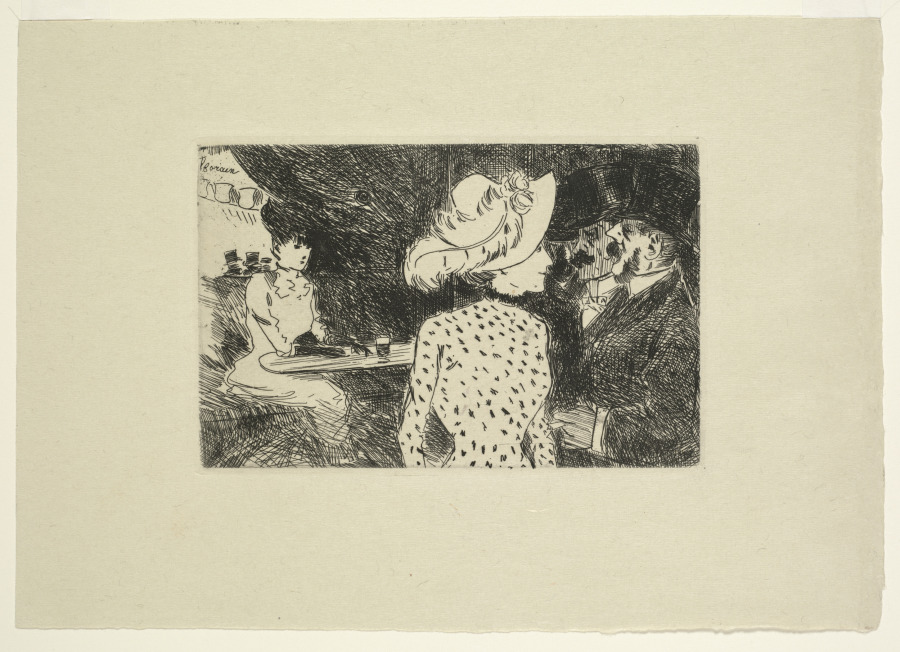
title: Cafe Scene (descriptive)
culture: France, 19th century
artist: Jean Louis Forain (French, 1852–1931)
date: 1880–1886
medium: etching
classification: Print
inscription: signed upper left in plate: forain